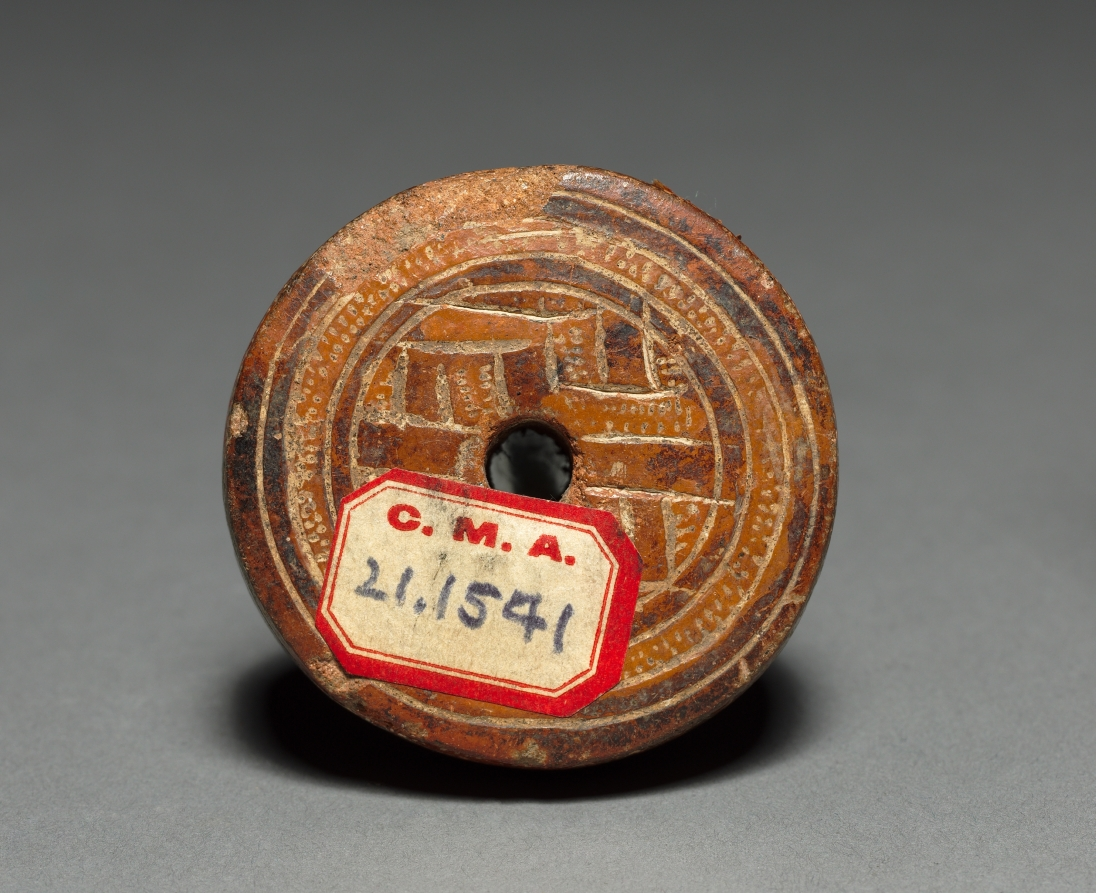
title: Spinning Whorl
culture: Colombia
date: before 1550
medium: red ware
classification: Ceramic